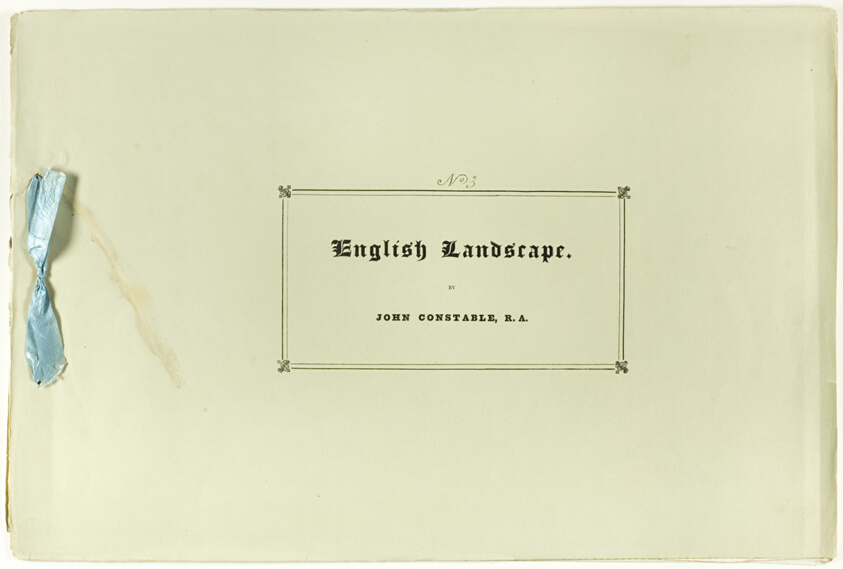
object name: Print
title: Various Subjects of Landscape Characteristic of English Landscape Scenery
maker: David Lucas (English, 1802-1881); after John Constable (English, 1776-1837)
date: 1830/32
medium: Portfolio cover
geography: England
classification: portfolio cover; portfolio; prints and drawing; print